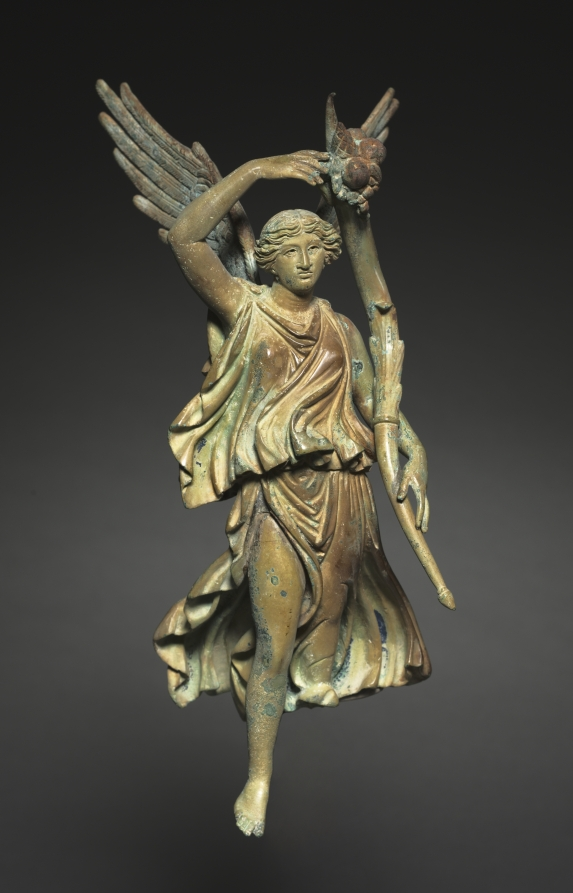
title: Victory with Cornucopia (Chariot Attachment)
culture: Italy, Rome, Imperial, later Julio-Claudian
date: 40–68 CE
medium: bronze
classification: Sculpture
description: In Roman times, the arrival of Winged Victory—touching down to earth, her drapery flying behind her—was a moment not just of military conquest, but was the first step toward peace and prosperity.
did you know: The cornucopia held by this Winged Victory overflows with fruits, grains, and other signs of abundance.